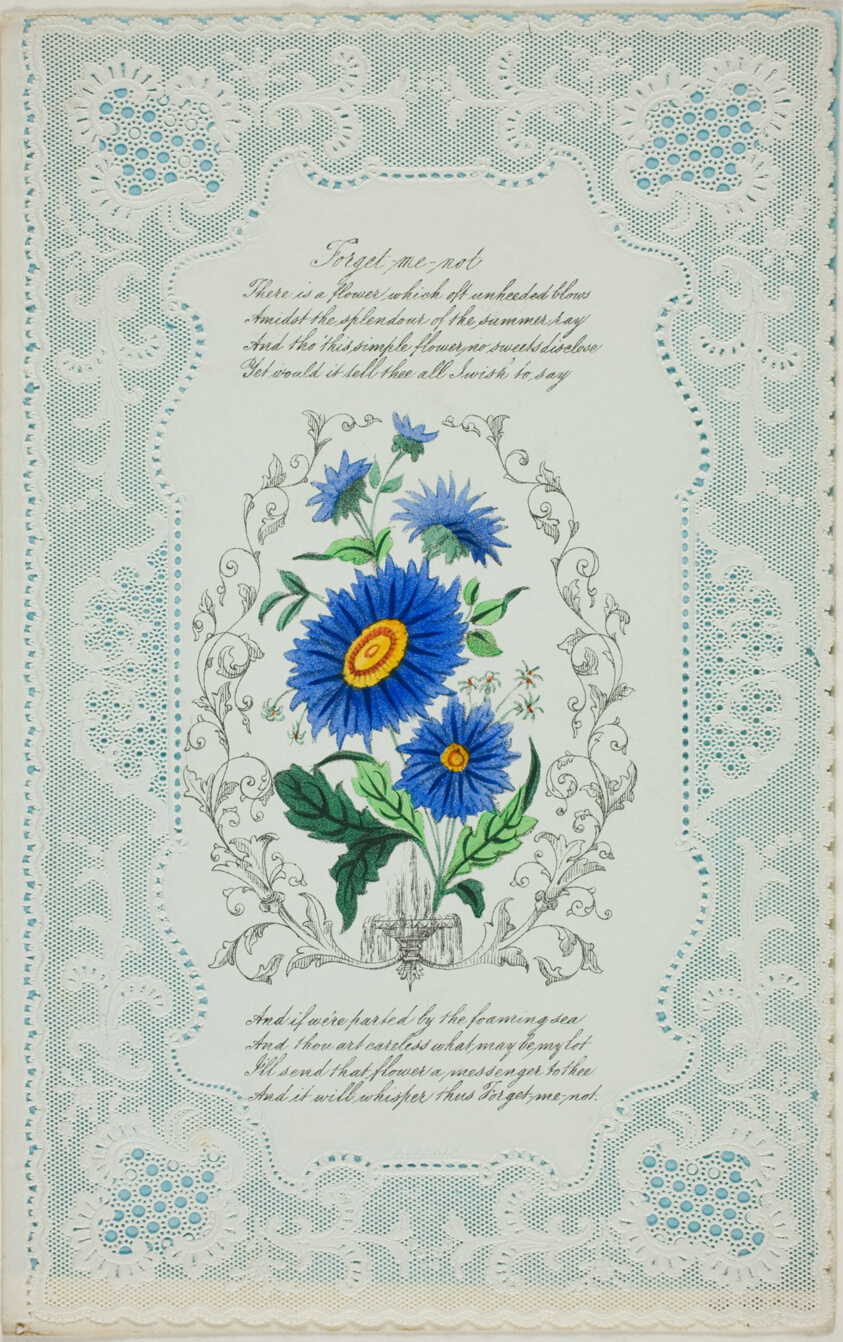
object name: Print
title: Forget Me Not (valentine)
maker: George Kershaw (English, 19th century)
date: c. 1850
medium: Lithograph with hand-coloring on cut and embossed ivory wove paper (lace, folded), with blue wove paper insert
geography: England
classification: valentine; prints and drawing; print